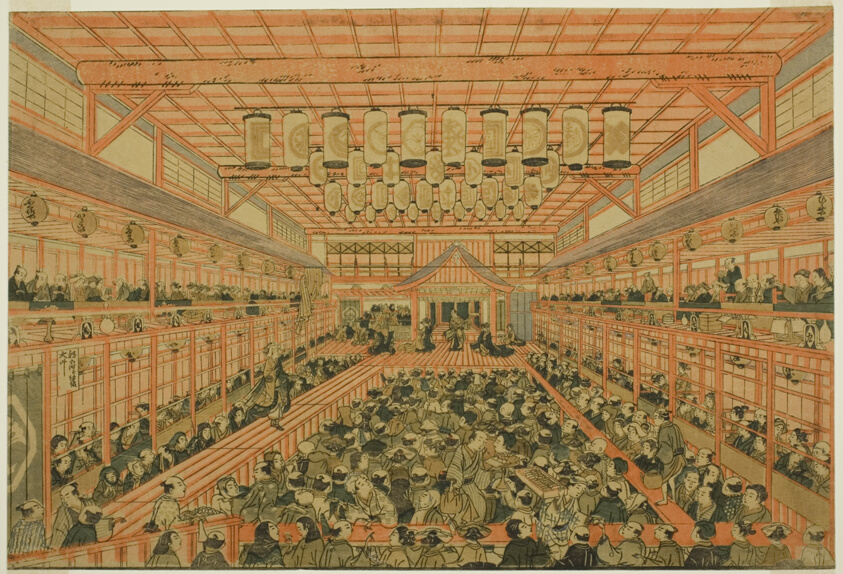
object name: Print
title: Perspective Picture of a Kabuki Theater (Uki-e Kabuki shibai no zu)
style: Japanese (culture or style)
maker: Utagawa Toyoharu (Japanese, 1735-1814)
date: c. 1776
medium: Color woodblock print; oban, trimmed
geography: Japan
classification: woodblock print; print; asian art